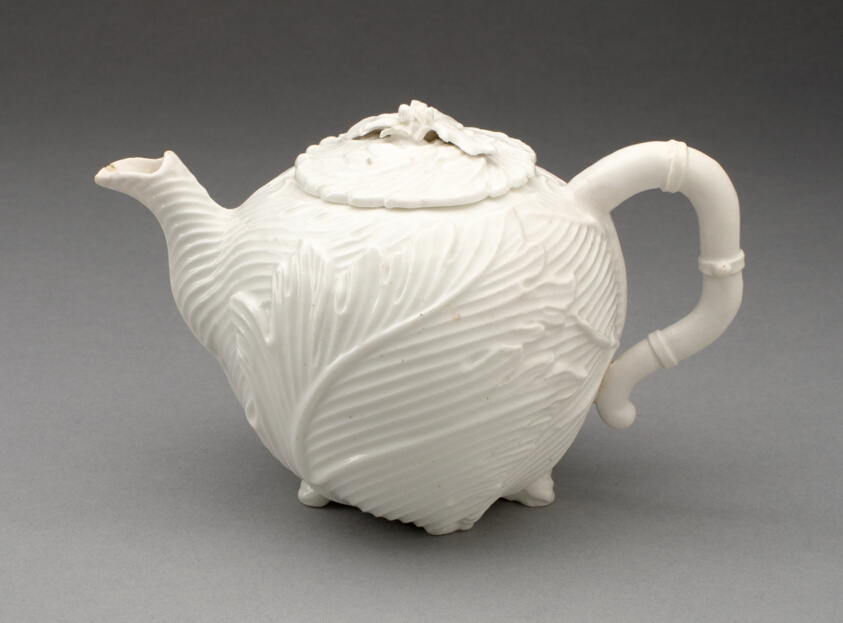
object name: Ceramics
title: Teapot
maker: Chelsea Porcelain Manufactory; London, England, c. 1745-1784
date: 1747/49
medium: Soft-paste porcelain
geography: Chelsea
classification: teapot; ceramics; porcelain; european decorative arts